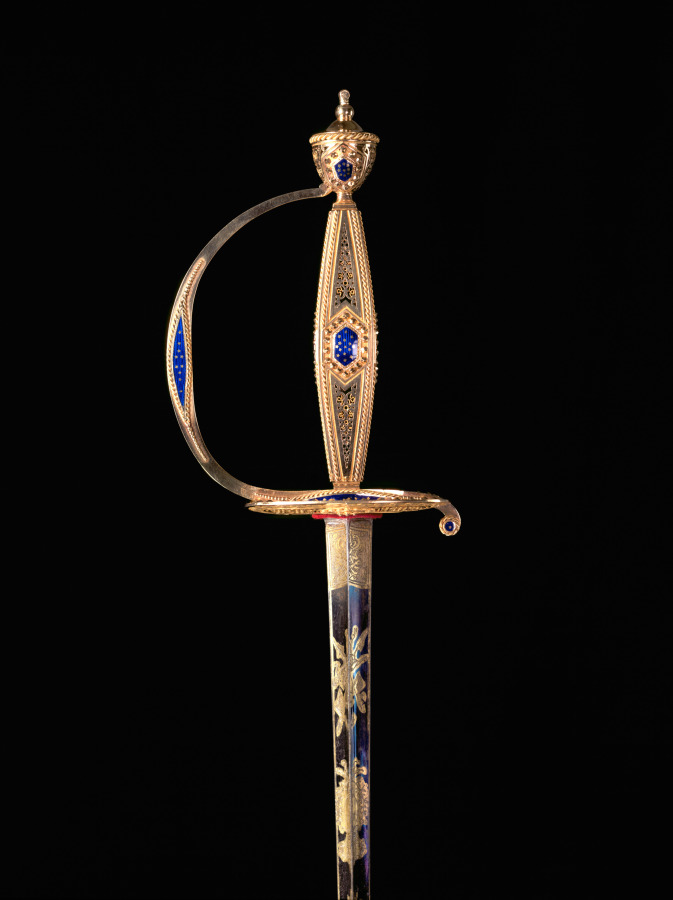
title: Small-Sword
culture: Switzerland, Geneva(?) (blade: Germany, Solingen, early 18th c.), late 18th Century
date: c. 1790–1800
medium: hilt: gold with blue translucent enamel; blade: etched, blued and gilded steel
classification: Arms and Armor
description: This example shows the small-sword at its latest and most refined stage of development. Though highly reflective of French taste, it was probably fashioned in a Swiss workshop under French influence or by a French craftsman working in Switzerland. Worn publicly as an emblem of social rank, this sword was likely custom-made for an affluent individual to use on formal or court occasions. So-called because of its short blade, the small-sword emerged as the light and quick weapon of choice for aristocratic civilians during the 1700s. Such a sword was traditionally suspended at about mid-thigh from the left side of a belt, the hilt exposed through the opening of the gentleman's coat. Highly visible, the hilt invited lavish decoration through precious materials such as gold and enamels, as seen here. Considered a type of masculine jewelry at that time, small-swords featured a variety of hilt styles that went in and out of fashion. Many were decorated to match personal costume, and jewelers worked on the finest small-swords of the day.